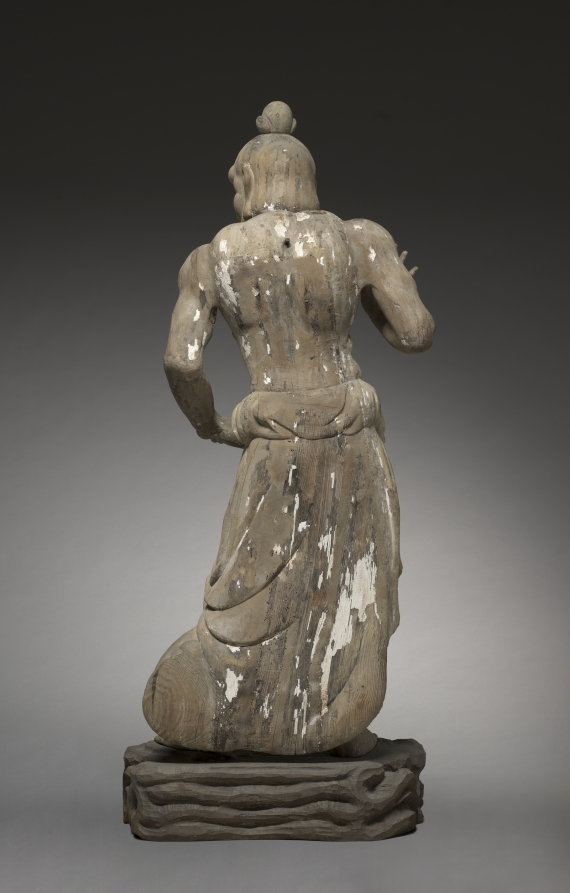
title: Guardian Figure: Nio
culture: Japan, Kamakura period (1185–1333)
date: 1200s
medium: chestnut and cypress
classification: Sculpture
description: A pair of guardians usually stands at the entrance of Japanese Buddhist temples. Traditionally, the pair included a closed-mouth figure, one hand displayed as if indicating his potential power, and an open-mouth figure, expelling his full force against evil spirits. Nio figures were usually displayed outdoors, often with just the roof of the entrance gate as protection, and as such were particularly susceptible to weathering.